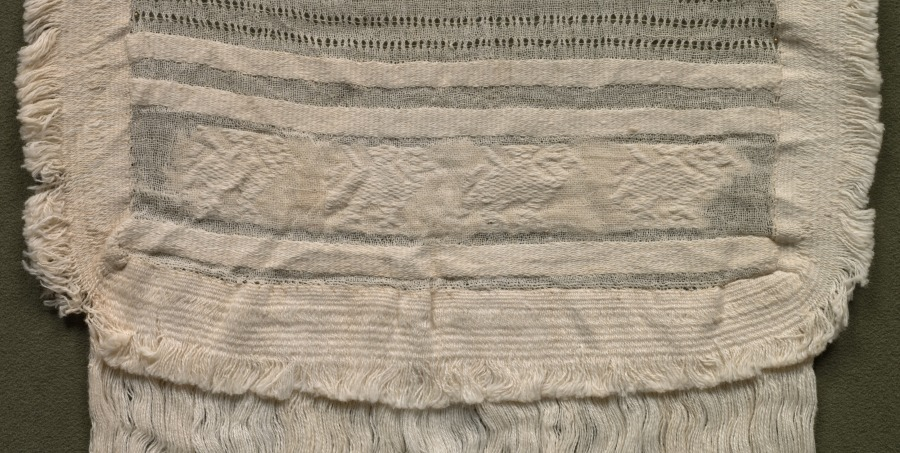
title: Turban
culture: Peru, North Coast, Chimú style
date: 1485–1640 (radiocarbon date, 95.4% probability)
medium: Cotton; plain weave, brocaded and complex alternating gauze with 5 shots of plain weave between gauze shots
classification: Garment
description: Chimú garments like this one consist of a large, rectangular central section—here measuring some 65 inches by 50 inches—with decorated tabs stitched to two opposite corners. Such garments probably were worn as turbans but we do not understand exactly how. For the purpose of display, the plain central section of this example has been folded to form a wide band, with the tabs arranged on either side.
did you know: The white cotton yarns used to make this textile are only 0.1 to 0.2 millimeters in diameter.